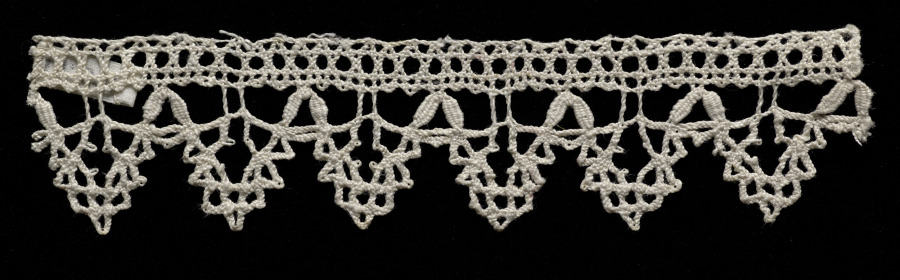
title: Lace Edging with Points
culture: Italy, Genoa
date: 1550–99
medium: Bobbin lace (Plaited Lace)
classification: Lace